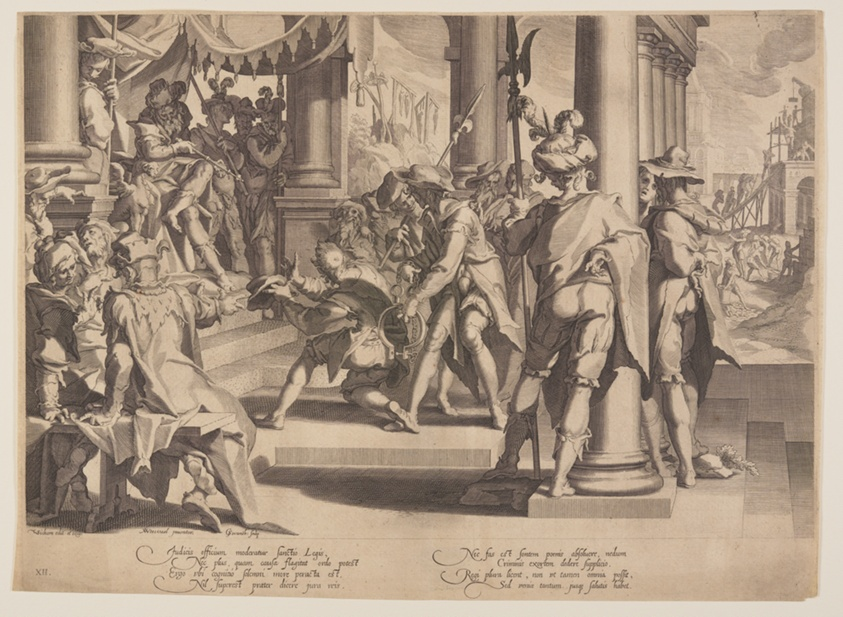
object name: Print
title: Allegory of Justice, Sanctity of Law, plate 12 from Thrones of Justice (Thronus Iustitiae)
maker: Willem van Swanenburgh (Dutch, 1580–1612); after Joachim Wtewael (Dutch, 1566–1638)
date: 1606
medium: Engraving on ivory laid paper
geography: Netherlands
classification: print; paper; prints and drawing; engraving